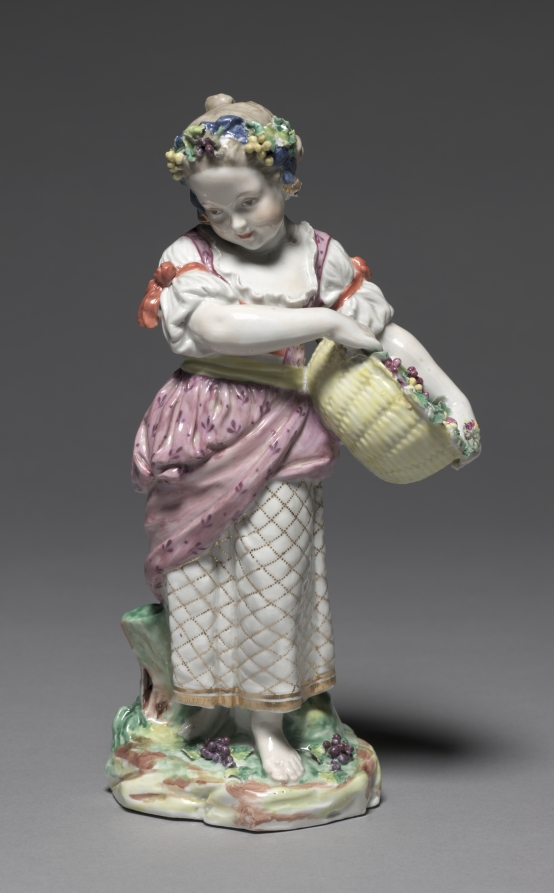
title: Figure of Autumn from the Four Seasons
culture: England, Bristol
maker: Bristol Porcelain Factory (British, 1770–81)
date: c. 1775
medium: hard-paste porcelain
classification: Ceramic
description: The modern notion of childhood as a time of innocence and simplicity emerged during the second half of the eighteenth century. This understanding of adolescence led to numerous depictions of children as personifications of the four seasons. Here autumn is portrayed as a young girl playfully jostling her overskirt as she balances a basket of fruit against her hip. The grapes, plums, and apples filling her basket allude to a plentiful fall harvest.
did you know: Allegorical figures most often decorated a table during the dessert course, providing amusing subjects for conversation.